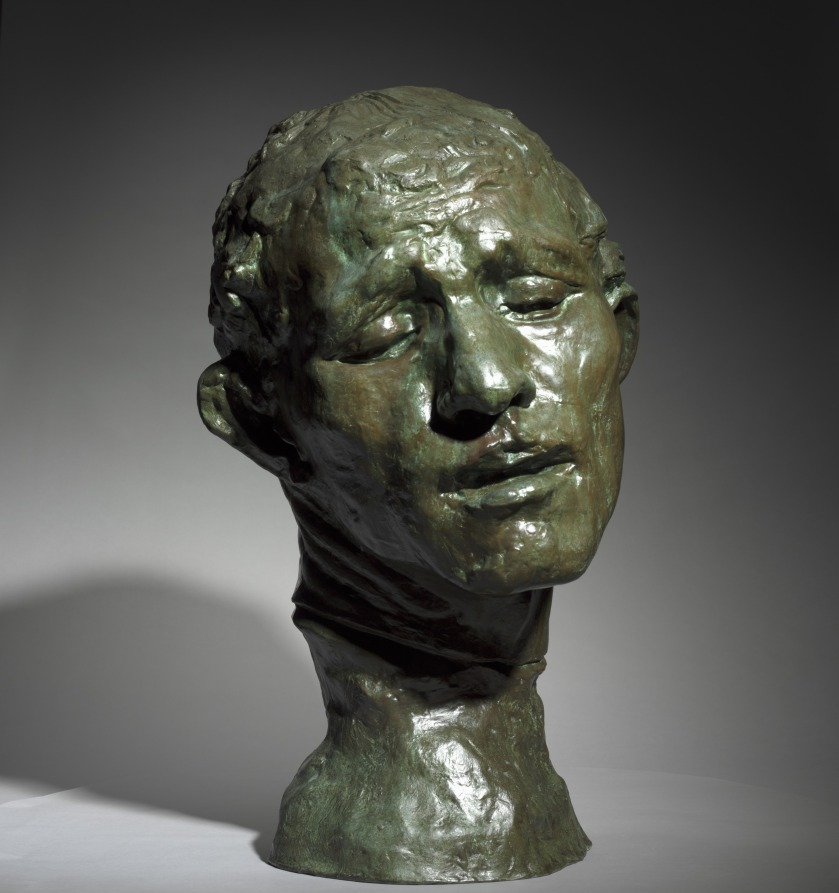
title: Heroic Head of Pierre de Wissant, One of the Burghers of Calais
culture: France, 19th century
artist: Auguste Rodin (French, 1840–1917)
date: 1886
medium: bronze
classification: Sculpture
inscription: inscribed at neck, left: A.Rodin; inscribed lower back: Alexis Rudier/Fondeur-Paris.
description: This sculpture depicts one of the figures in Rodin’s large public monument The Burghers of Calais (1884–89), featuring six French men who volunteered to be taken prisoner by the English in exchange for lifting the siege of Calais during the Hundred Years War (1337–1453). Pierre de Wissant’s anguished expression suggests extreme mental suffering as he contemplates his expected execution. Rodin exhibited a life-size version of the figure as an independent work before completing the monument. He later made multiple versions in various sizes and media.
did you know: This sculpture depicts the head of a figure from Rodin's large public monument The Burghers of Calais (1884-89). The CMA also owns a plaster version of the head.